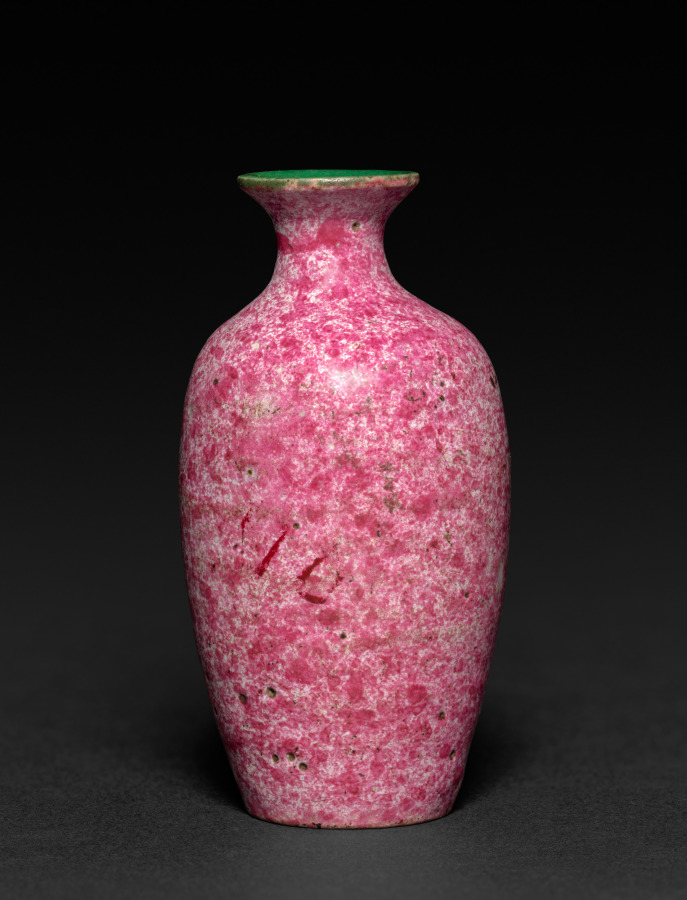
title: Miniature Vase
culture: China, Qing dynasty (1644–1911), Qianlong reign (1736–95)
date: 1736–95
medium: porcelain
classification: Ceramic